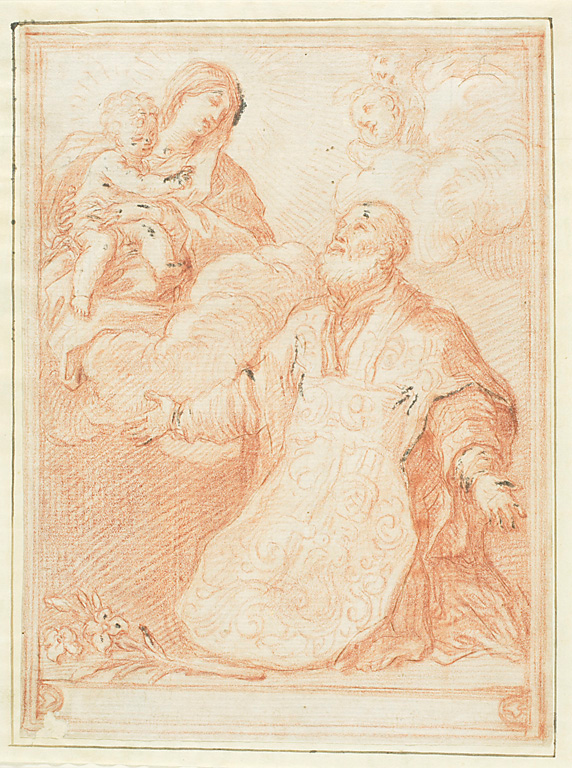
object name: Drawing and Watercolor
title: Vision of Saint Philip Neri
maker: after Guido Reni; Italian, 1575-1642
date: after 1614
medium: Red chalk, heightened with lead white (discolored), on buff laid paper, laid down on cream wove paper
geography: Italy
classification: chalk; drawings (visual works); prints and drawing